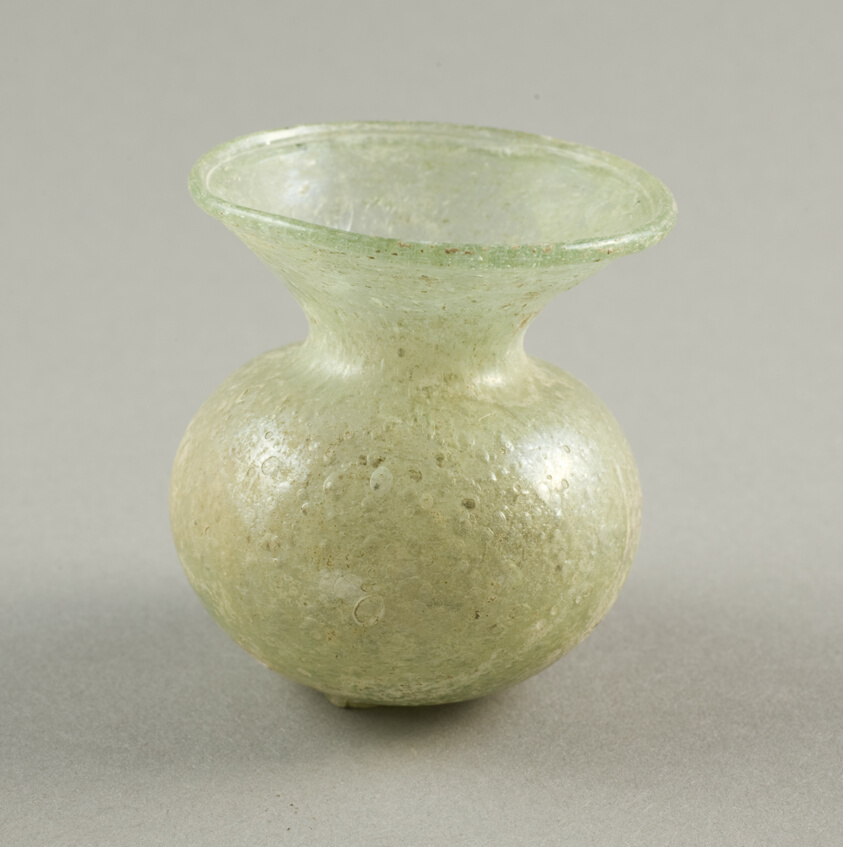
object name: Vessel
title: Jar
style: roman (ancient, style or period), ancient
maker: Roman; coast of Syria or Palestine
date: 2nd-3rd century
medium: Glass, blown technique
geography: Mediterranean Region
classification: glass; vessel; ancient art